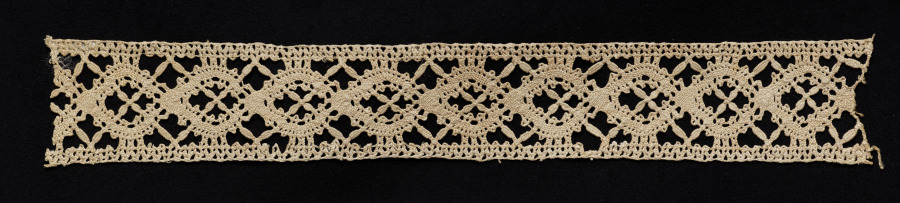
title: Lace Insertion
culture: Italy, Genoa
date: 1550–99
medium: Bobbin lace (needle lace, reticella design)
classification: Lace